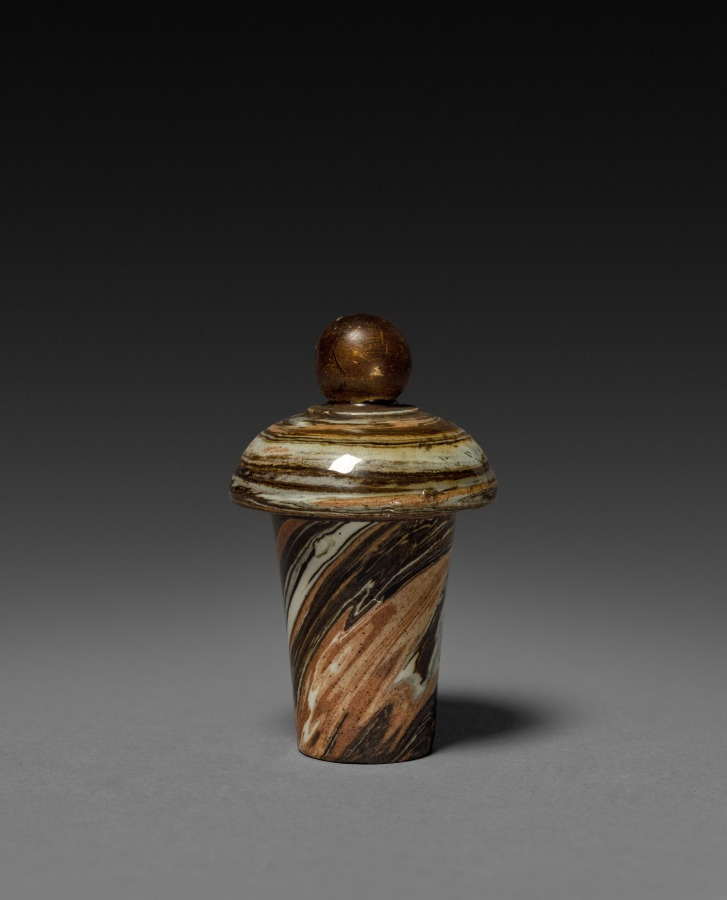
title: Urn (lid)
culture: England, late 18th or 19th century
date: late 1700s - 1800s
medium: earthenware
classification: Ceramic